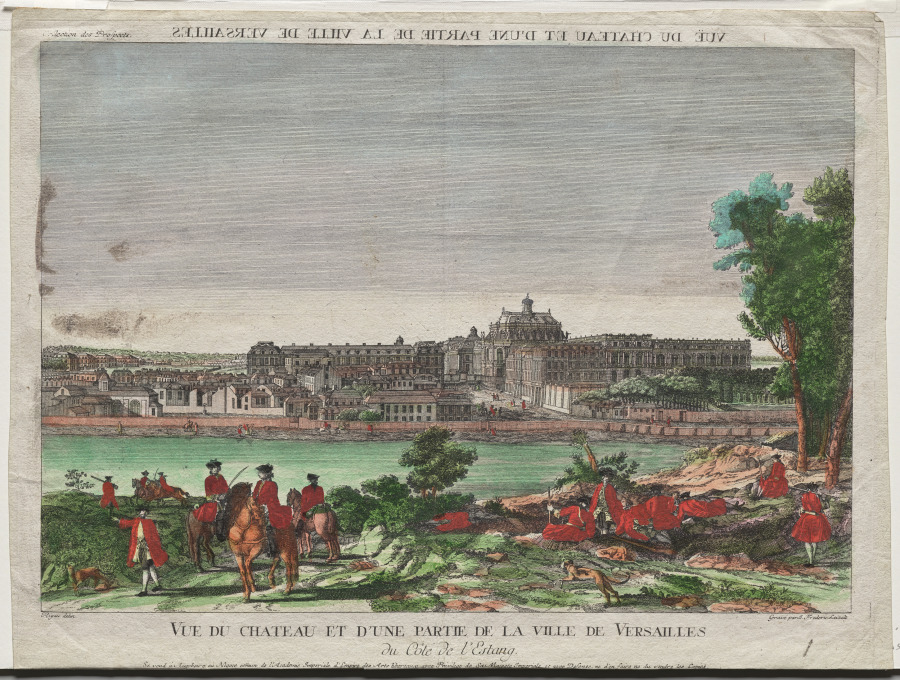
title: Vue du Chateau et d'une Partie de la Ville de Versailles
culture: France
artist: Balthasar Friedrich Leizelt (German, 1710–1820)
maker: after Jacques Rigaud (French, 1681–1754)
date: c. 1770–1800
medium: etching and engraving, hand colored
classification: Print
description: This perspective view (often called a vue d’optique,or optical view) is an example of a popular art and entertainment format during the second half of the 1700s in Europe. The hand-colored etching and engraving was made to be viewed with a special viewing device consisting of a convex lens and a mirror, so that scene appeared to be a three-dimensional image. Here, the viewer can enjoy a perspective view of the French Palace of Versailles. Such views—which were only made for a short time and largely disappeared with the advent of photography—appealed to both elite audiences, who viewed collections of images with their own viewing devices in private drawing rooms, and popular audiences, for whom they were street entertainment for a minimal fee.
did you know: The text at the top of this print is printed in reverse so that it would be legible when looking through a special viewing device consisting of a convex lens and a mirror.